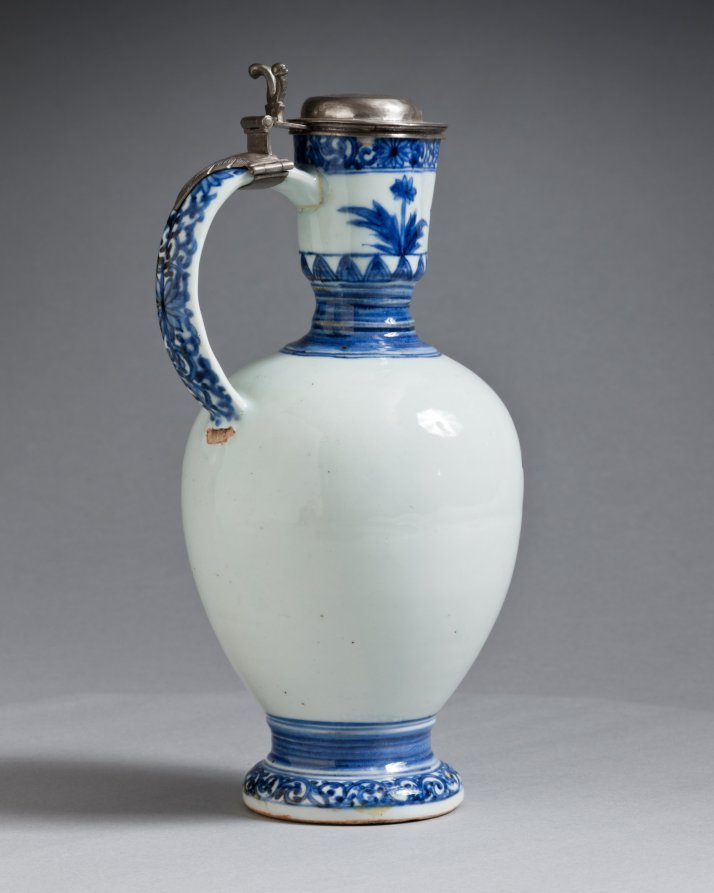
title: Jug with Silver Mounts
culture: Japan, Edo period (1615–1868)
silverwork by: Barent van Leeuwen (Dutch, 1637–1682)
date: c. 1662–76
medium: porcelain with underglaze blue decoration and silver mounts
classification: Ceramic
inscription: [on silver]: town mark for Amsterdam; lion rampant crowned (alloy mark for 0-934 silver); d (date letter for 1666), maker's mark of Barent van Leeuwen.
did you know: The coat of arms on this jug are those of the Valckenier family, active in the Dutch East India Company.